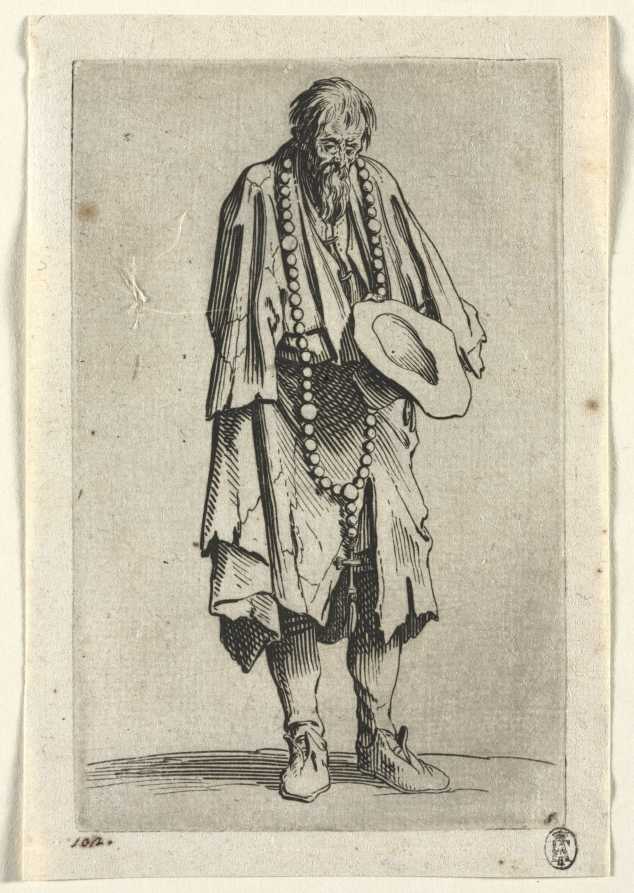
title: The Beggars: Beggar with Rosary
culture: France, 17th century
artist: Jacques Callot (French, 1592–1635)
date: c. 1623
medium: etching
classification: Print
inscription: Inscribed lower left in pen and brown ink: "102."